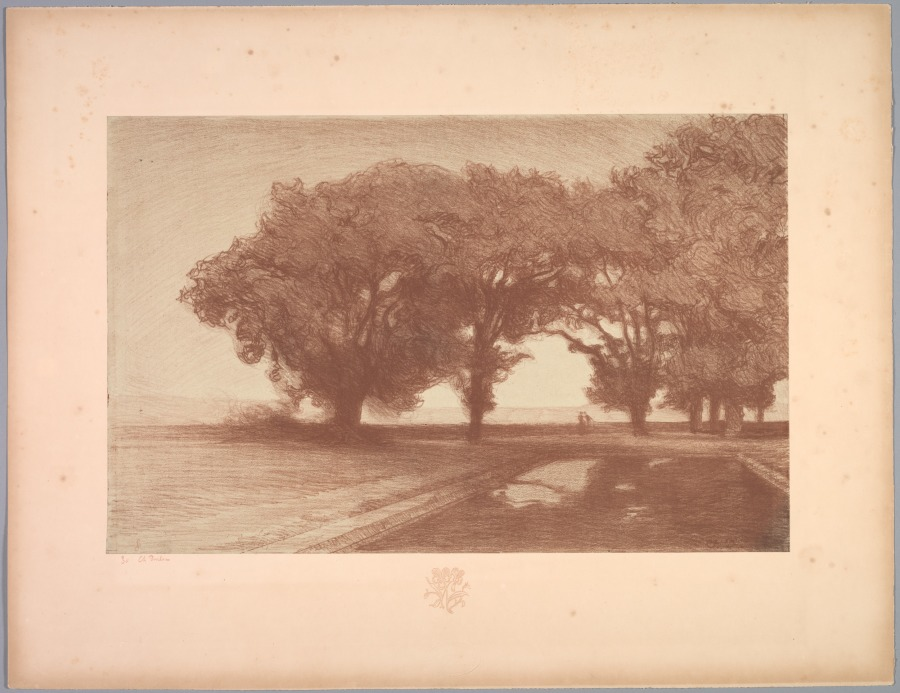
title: Suite de Paysages: Landscape, Plate 8, Remarque, Pansies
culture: France, 19th century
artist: Charles Marie Dulac (French, 1865–1898)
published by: Printed by Monrocq Frères, Paris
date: 1892–93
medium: color lithograph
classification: Print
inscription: Below image, left, in reddish brown pencil: 30 Ch Dulac; In plate, lower right corner: Ch Dulac ; in plate, lower left corner: 8 Bottom center, blindstamp: MONROCQ FRÈRES / ÉDITEURS IMPRIMEURS / PARIS / RUE SUGER, 3 encircled